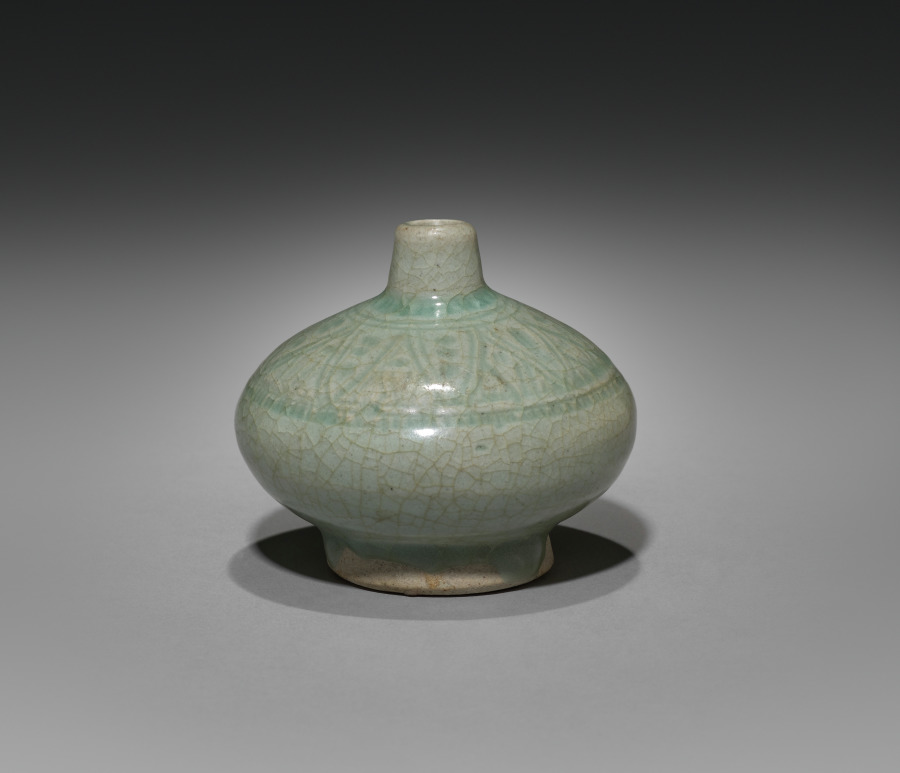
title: Small Jar: Sawankhalok Ware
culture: Thailand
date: 1300s–1400s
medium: porcelain with celadon glaze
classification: Ceramic